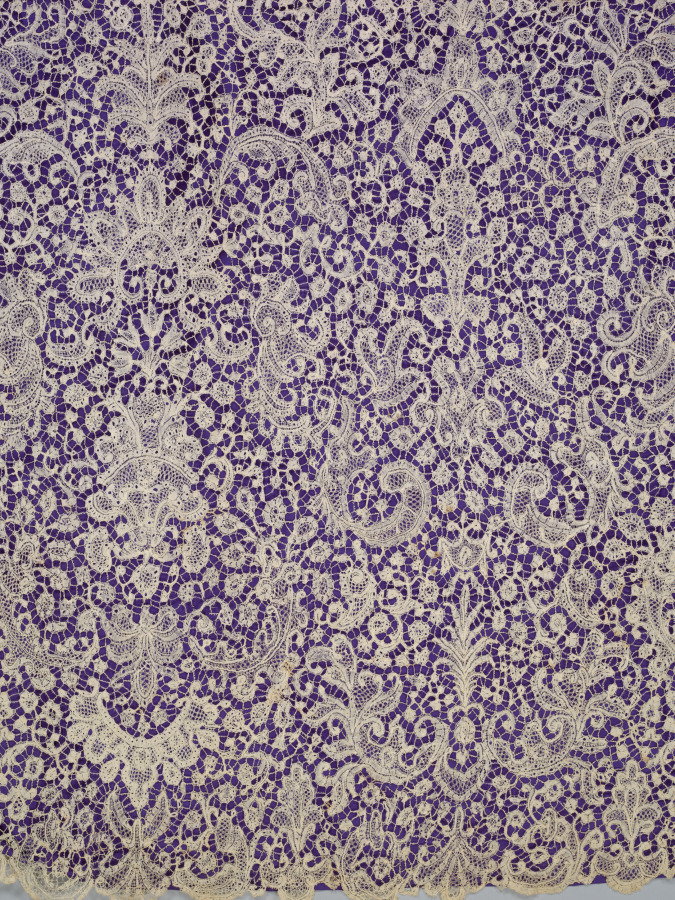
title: Alb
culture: Spain: embroidered linen; Flanders: bobbin lace (Point d’Angleterre) flounce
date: Embroidered Linen: 1600s; Bobbin Lace (Point d’Angleterre) Flounce: 1700s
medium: Plain weave linen embroidered in gold and silver; linen bobbin lace (Point d’Angleterre a Reseau)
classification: Garment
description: This beautiful vestment, called an alb, was worn under other liturgical garments by the clergy who served at the altar. Embroidered with gilt-metal thread flora on a linen ground, it is trimmed with a flounce and cuffs of lace, the most fashionable and expensive material at the time. Its purple silk lining indicates that it belonged to an archbishop. The exquisitely worked bobbin lace consists of two large composite floral designs flanked by popular curved forms on an elaborate bar ground that repeats ten times around the flounce.